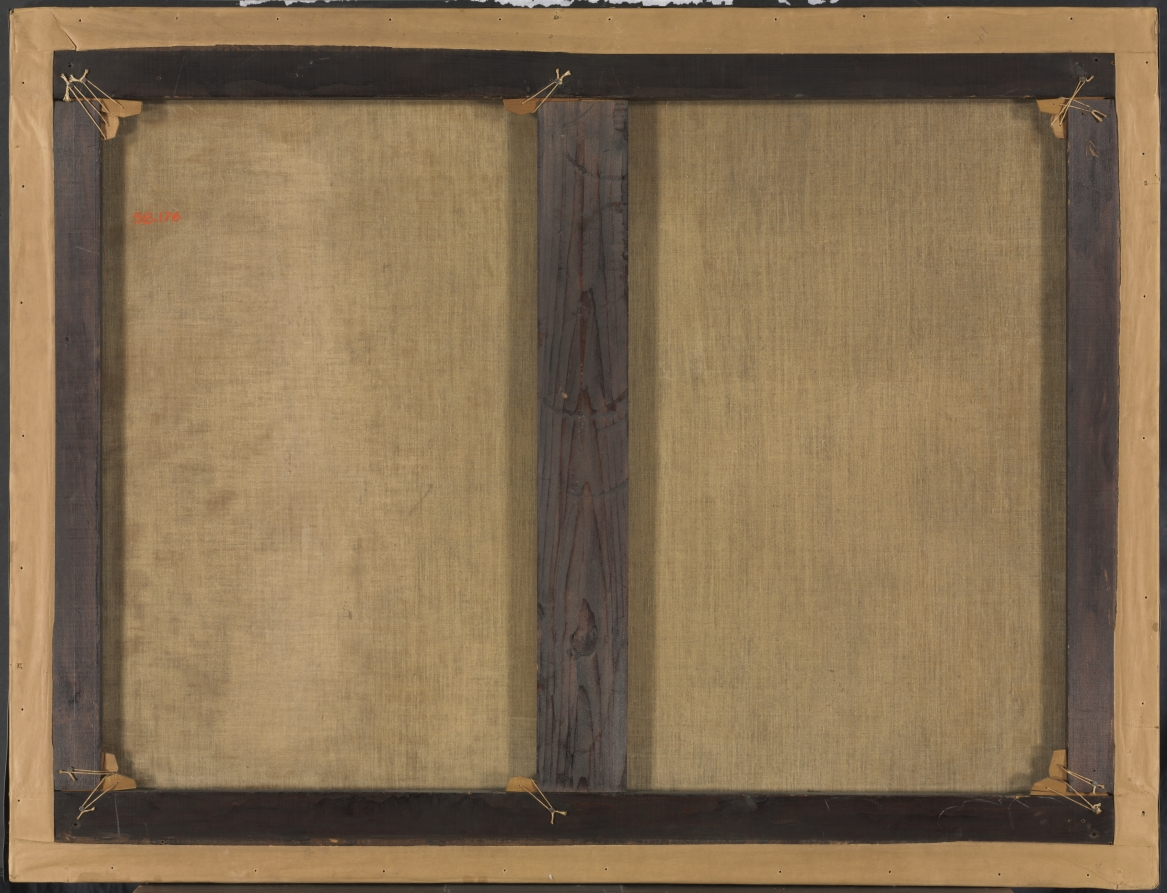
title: Peasant Children Dancing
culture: France, 17th century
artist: circle of Le Nain (French)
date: 1650s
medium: oil on canvas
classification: Painting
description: This scene of outdoor, rustic frivolity was probably painted by the Master of the Béguins, a Flemish imitator of the Le Nain brothers who capitalized on their success around the 1650s in Paris. Distinct features of this artist's style are the wide eyes, pudgy cheeks, and white peasant caps—béguins—that give the artist his name. The sturdy and comical peasants, clothed in coarse fabrics with heavy folds, and the use of earthen tones emphasize the provincial mood. During the mid-17th century, the treatment of the poor and lower classes was a subject of great debate in the Catholic Church in Paris, especially at Saint Sulpice, where the Le Nain brothers were buried. Scenes of everyday workers or peasants were incredibly popular, drawing on both comic, Flemish genre scenes of drinking and the French interest in carefully observed, realistic details. Although the picture's meaning remains ambiguous, the gaiety of this world comes from the wonderfully naturalistic details, such as the worn hole on the piper's elbow, the villagers' cheerful expressions, and still-life details such as the ripe apples and reflective drinking vessel.